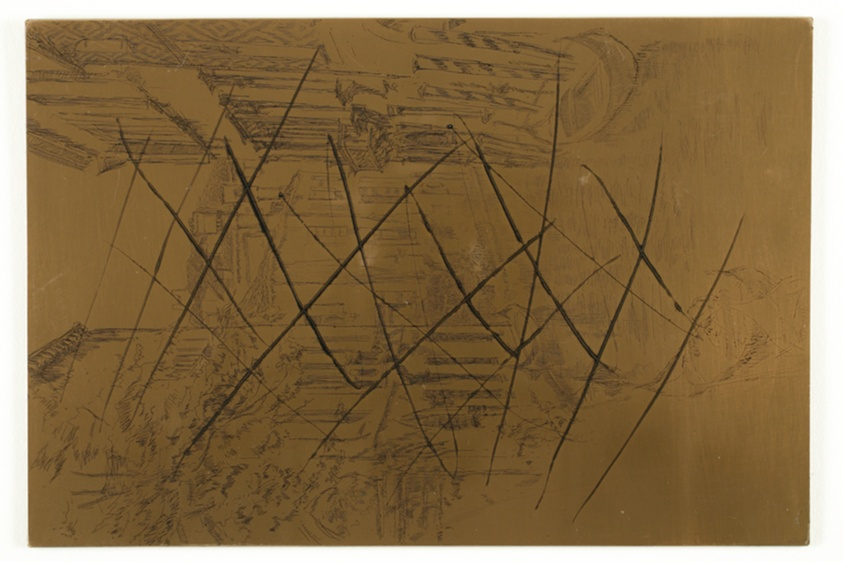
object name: Print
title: Quiet Canal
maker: James McNeill Whistler (American, 1834-1903)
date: 1879/80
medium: Cancelled copper plate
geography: United States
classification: copper plate; prints and drawing; matrix; etched plate; print